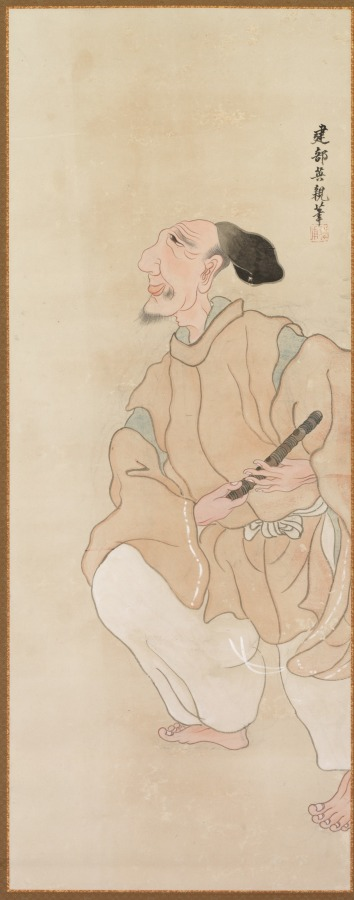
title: Genre Figures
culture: Japan, Edo period (1615–1868)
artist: Takebe Sōchō (Japanese, 1760–1814)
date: c. 1816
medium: hanging scroll; ink and color on paper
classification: Painting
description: Though rarely mentioned in official histories, Sōchō was an accomplished painter whose talent is readily apparent to the modern eye. For his compositions he chose traditional Japanese stories or everyday events. This scroll is part of a triptych of paintings converted from the folding screen format into the hanging scroll format.